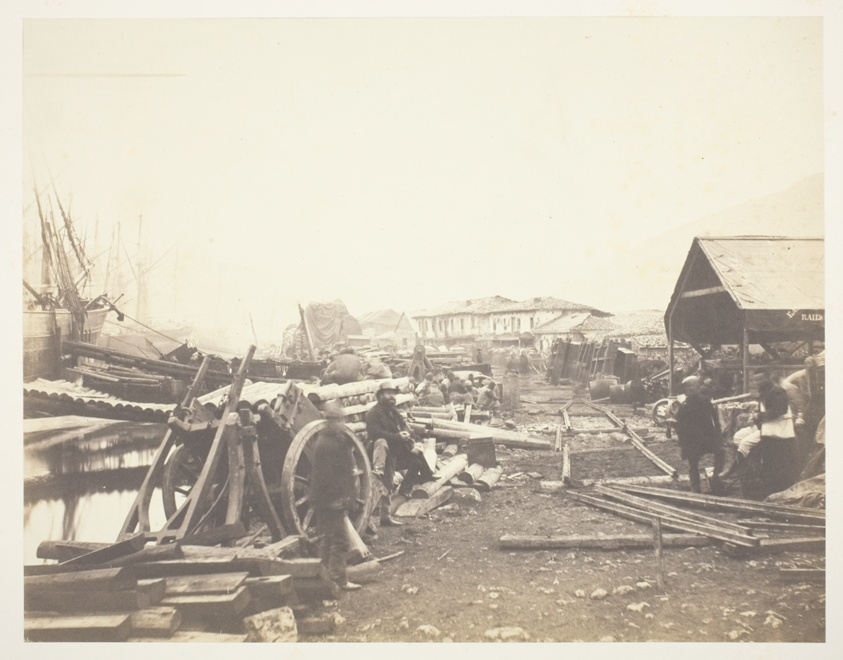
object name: Photograph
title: Landing Place, Railway Stores, Balaklava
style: 19th century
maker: Roger Fenton (English, 1819–1869)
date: 1855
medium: Salted paper print, from the album "Photographic Pictures of the Seat of War in the Crimea" (1856)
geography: England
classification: salted paper print; photographic process; photography; photograph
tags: Collected by Hugh Edwards